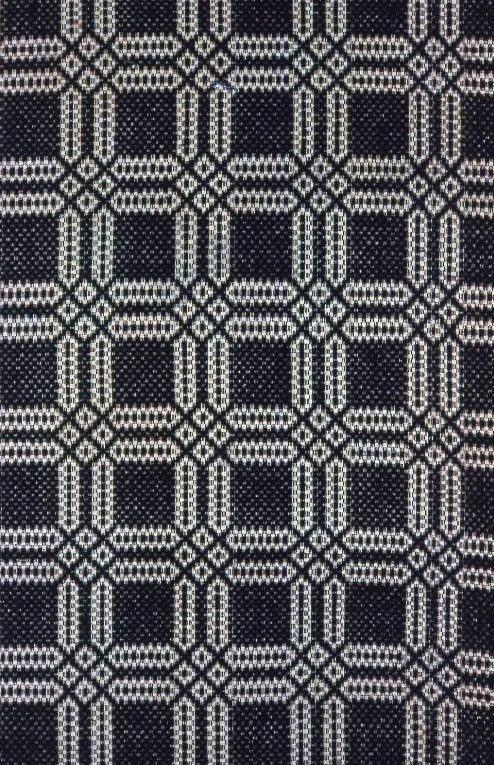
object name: Textile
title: Coverlet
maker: Sarah Scott (American, active c. 1880); United States, Southern Illinois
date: 1880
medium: Cotton and wool, plain weave with supplementary patterning wefts (overshot); two loom widths joined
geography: Illinois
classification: textile; coverlet; weaving - coverlet; weaving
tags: coverlet